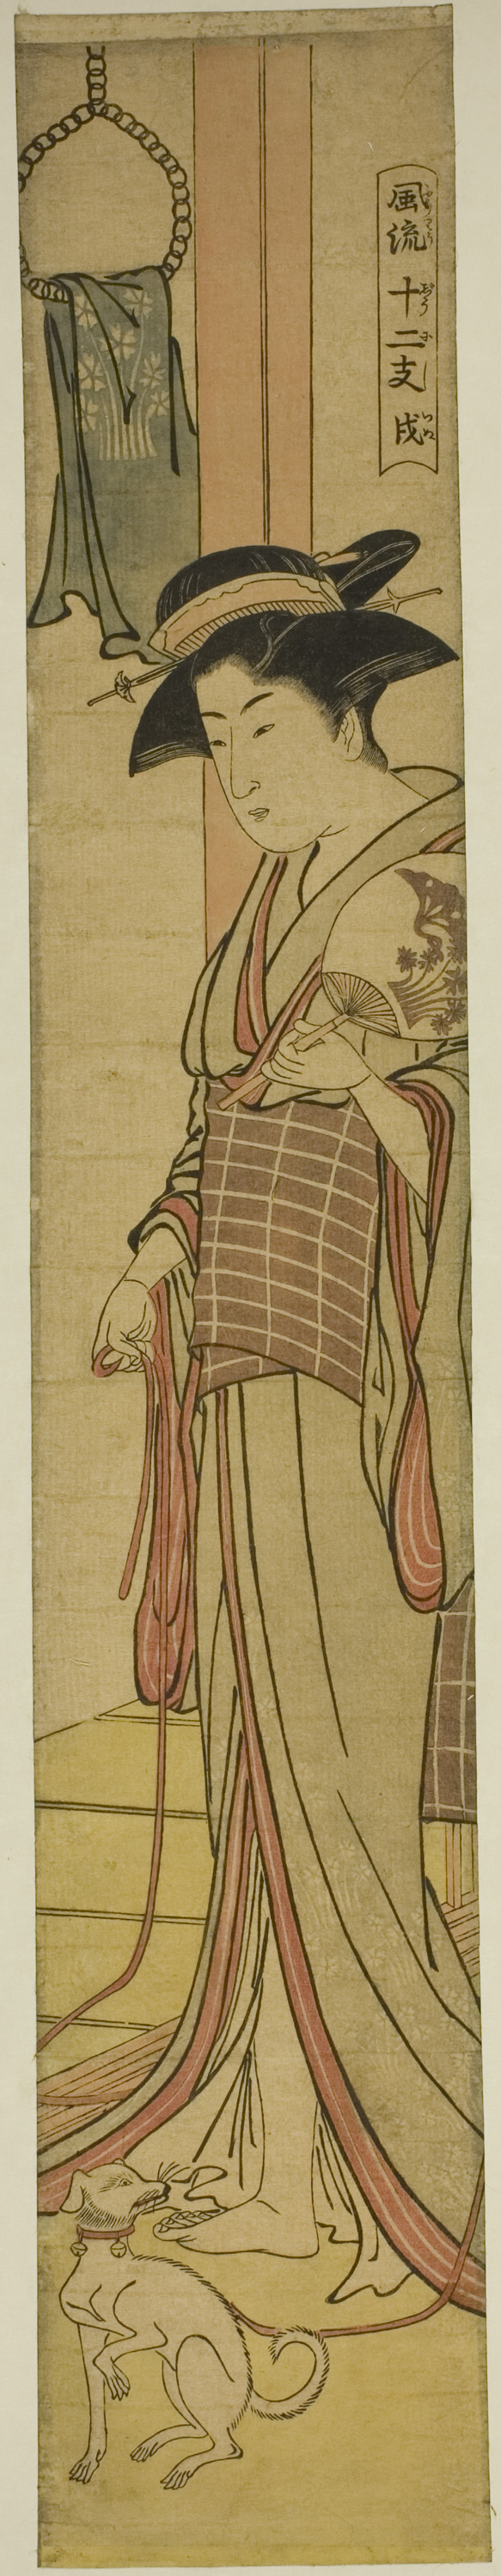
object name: Print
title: Dog (Inu), from the series "Fashionable Twelve Signs of the Zodiac (Furyu juni shi)"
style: Japanese (culture or style)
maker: Attributed to Torii Kiyonaga; Japanese, 1752-1815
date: c. 1782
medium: Color woodblock print; hashira-e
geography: Japan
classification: woodblock print; print; asian art